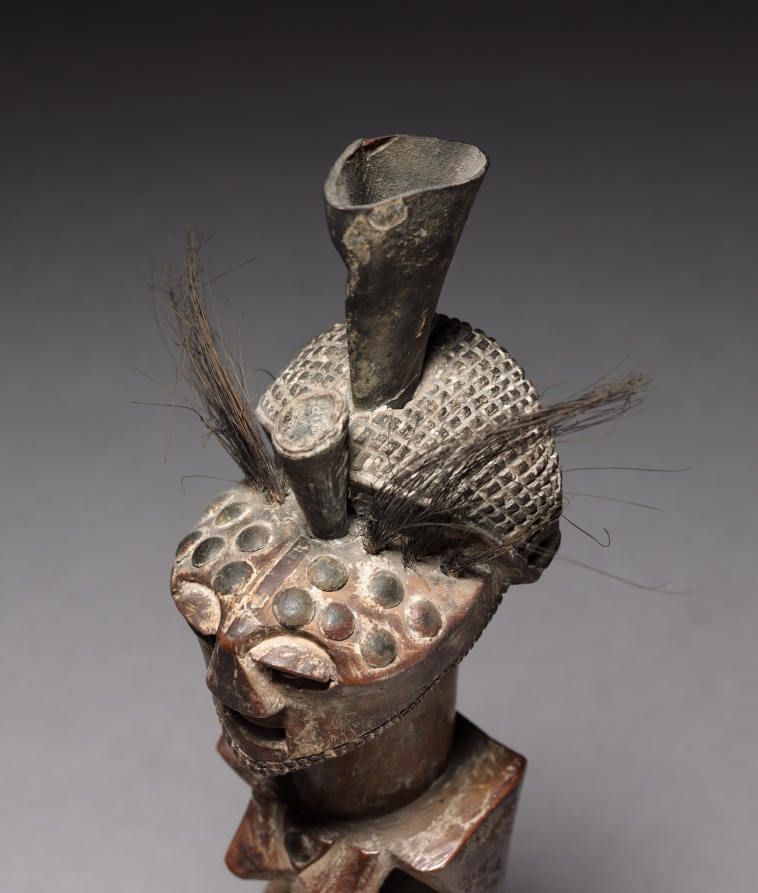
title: Female Figure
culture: Africa, Democratic Republic of the Congo, Songye people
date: late 1800s-early 1900s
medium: Wood, upholstery studs, antelope horns, and animal hair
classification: Sculpture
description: Mankishi figures were believed to have magical powers and were used by diviners to contact spirits in otherworldly realms. Smaller, personal power figures were used to connect with “common” ancestors, while the larger Mankishi figures contacted higher-ranking ancestral spirits. These power figures were kept in their own personal spaces because of their powerful status, and could only be handled by their designated nkunja, or guardian.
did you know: Because this Mankishi is neither small or quite large in size, it was most likely used by a family rather than an individual.